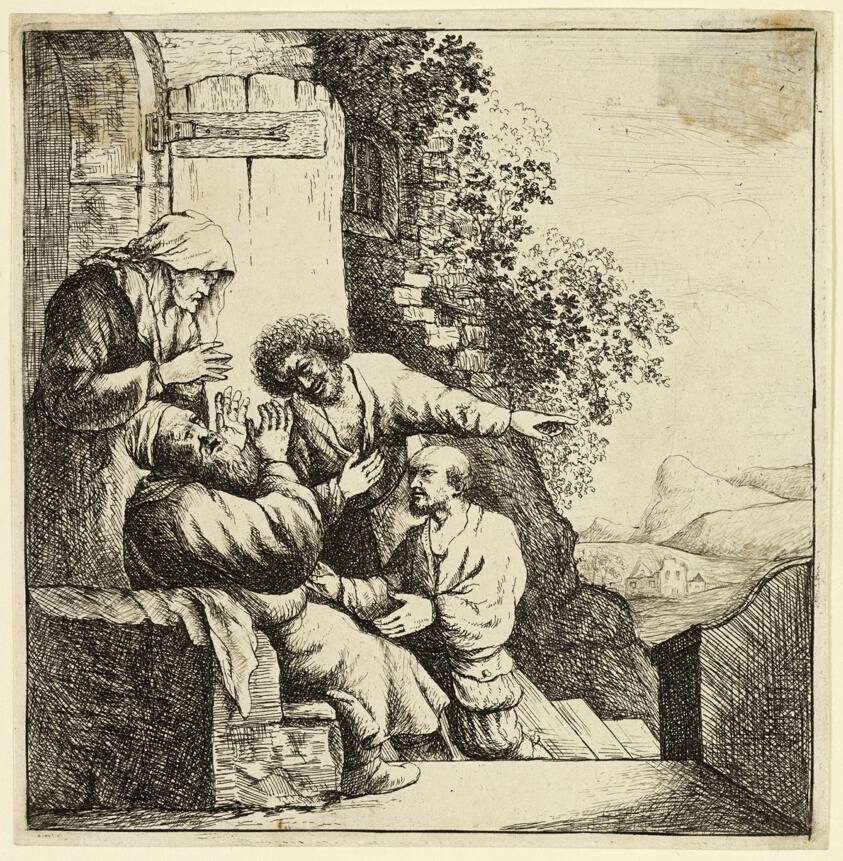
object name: Print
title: Joseph's Coat Brought to Jacob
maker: David Deuchar (English, 1743-1808); after Rembrandt van Rijn (Dutch, 1606-1669)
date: 18th c.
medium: Etching in black on ivory wove paper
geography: England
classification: etching; paper; print; prints and drawing